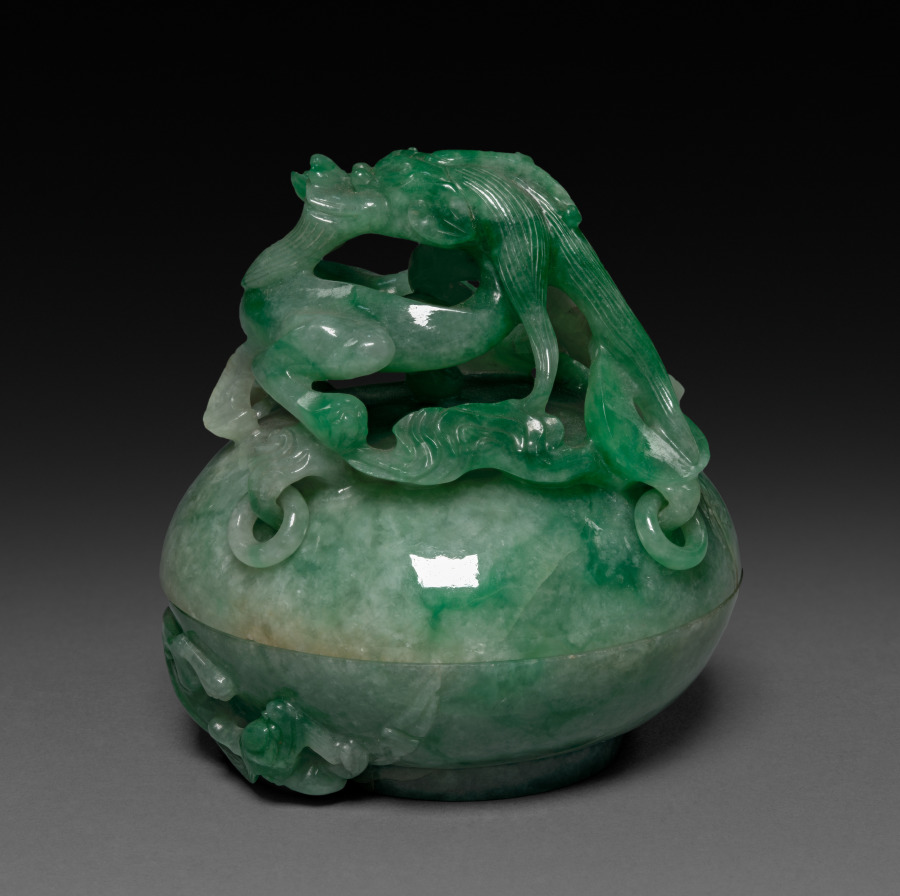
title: Three-Sectional Altar Group: Small Bowl with Carved Dragon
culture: China, Qing dynasty (1644-1911)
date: 1644–1911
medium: jade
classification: Jade